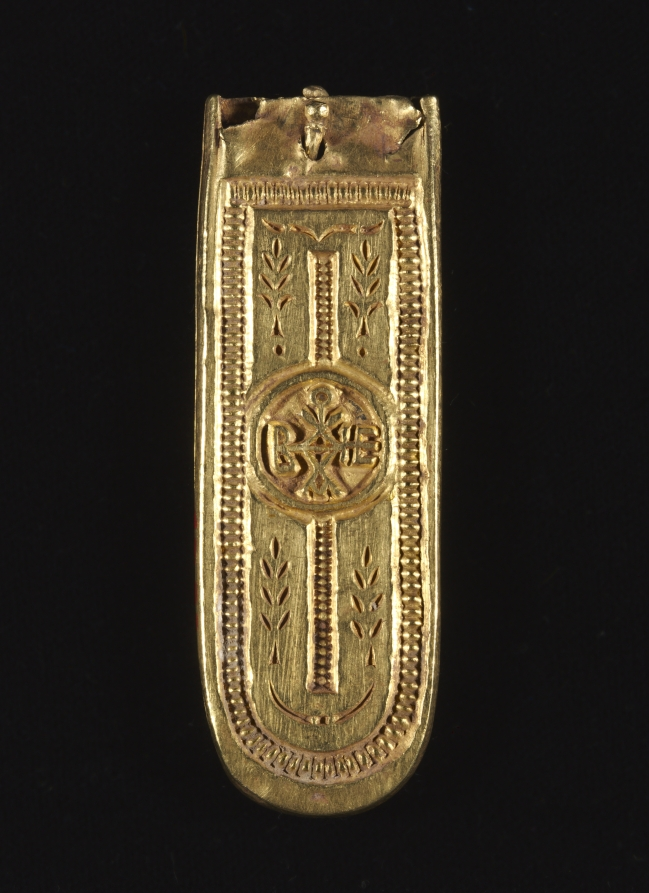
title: Tab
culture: Byzantium, Avaric, 7th century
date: 600s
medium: gold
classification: Metalwork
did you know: Although this entered the collection with a buckle, it was later determined that they did not originally belong together.